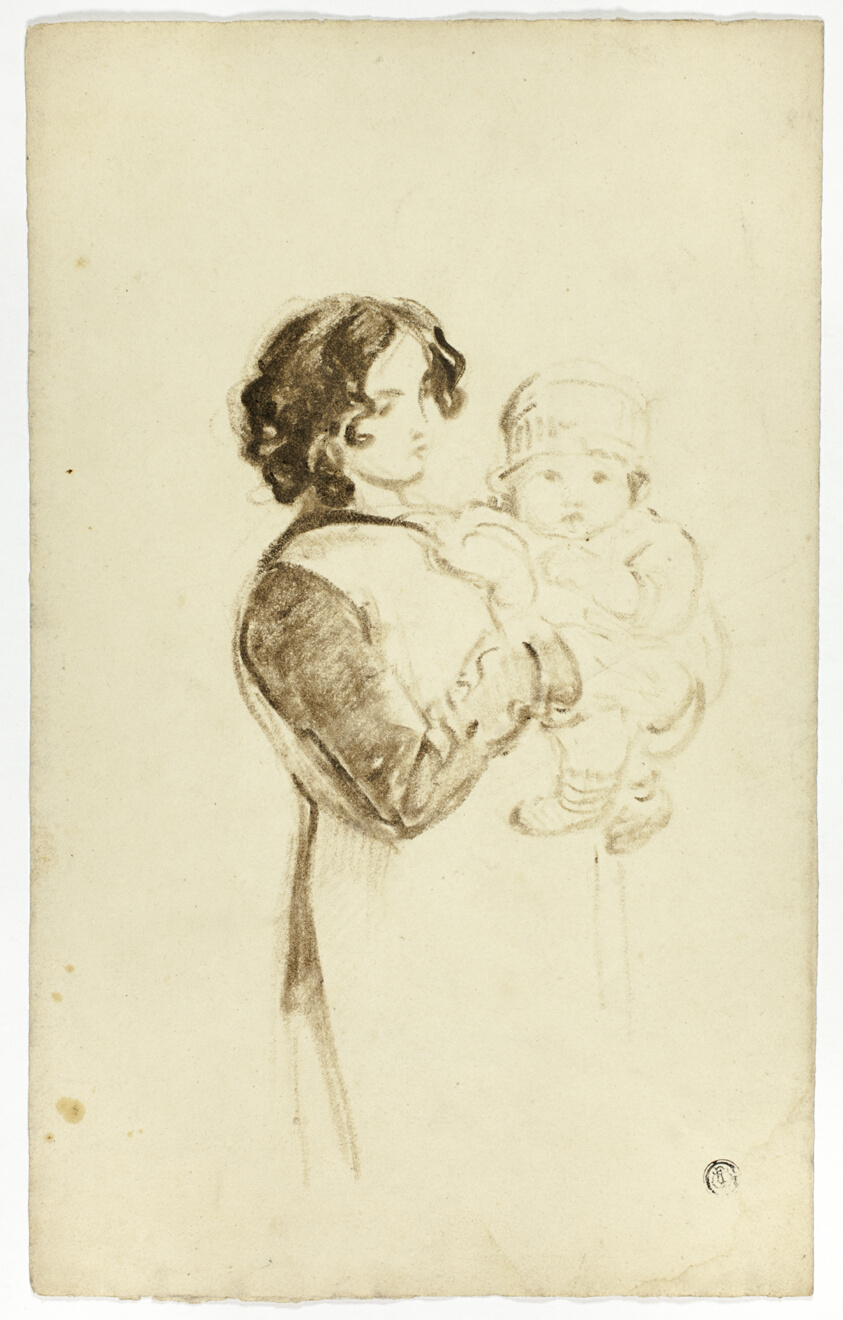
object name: Drawing and Watercolor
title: Young Woman Holding Baby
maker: Thomas Jones Barker (English, 1815-1882); or Thomas Barker (English, 1769-1847)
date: c. 1830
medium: Bistre crayon on cream wove paper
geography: England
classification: drawings (visual works); paper; prints and drawing; crayon